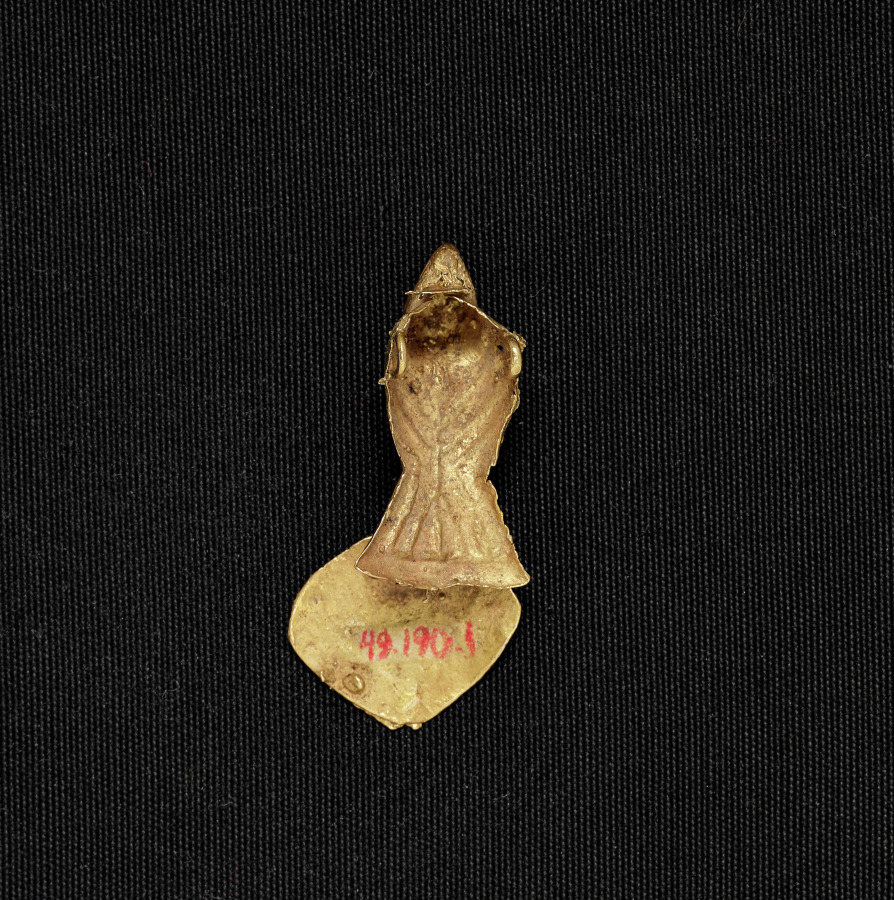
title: Bird Bead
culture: Colombia, Muisca style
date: c. 900–1550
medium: cast gold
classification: Jewelry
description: Muisca metalwork divides into two categories: ornaments to be worn, such as these, and offering figurines, in the case to the right. The elaborate bird pendant features delicate herringbone moldings, openwork patterns, and wing details-all part of the wax model from which the pendant was cast (see nearby computer animation). The dangles were attached after casting.